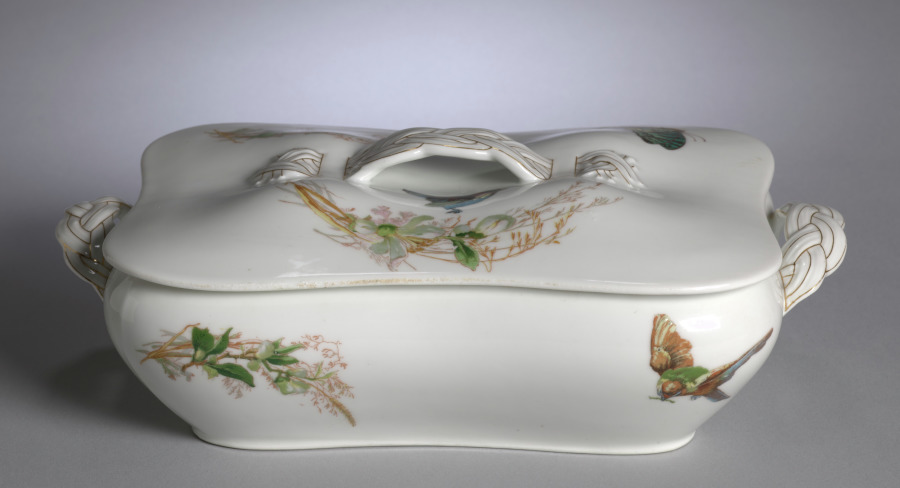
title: Covered Vegetable Bowl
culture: France, Limoges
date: c. 1890–1910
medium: porcelain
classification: Ceramic